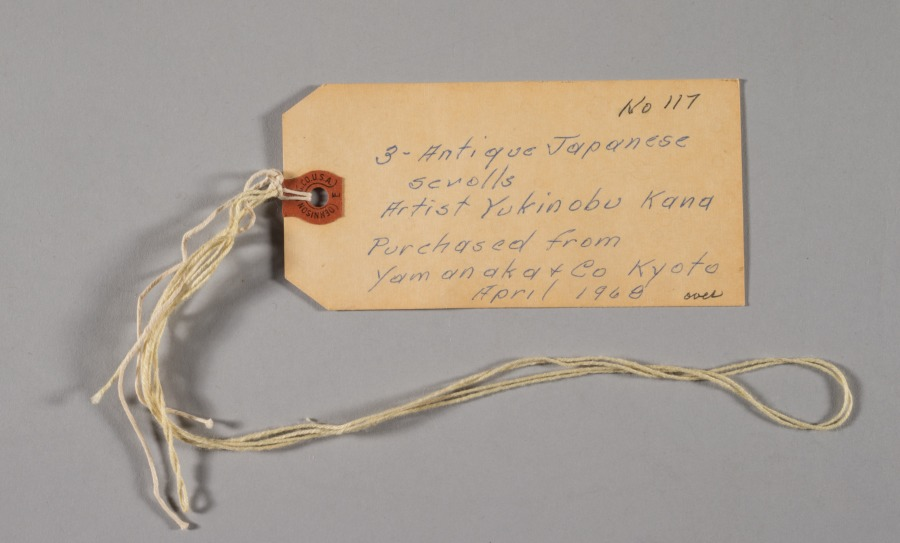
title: Sparrows on Blossoming Plum; A Sage with Tiger; Chinese Bird on Snow-Laden Branch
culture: Japan, Edo period (1615–1868)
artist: Kano Tan’yū (Japanese, 1602–1674)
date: 1661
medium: Triptych of hanging scrolls; ink and slight color on silk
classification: Painting